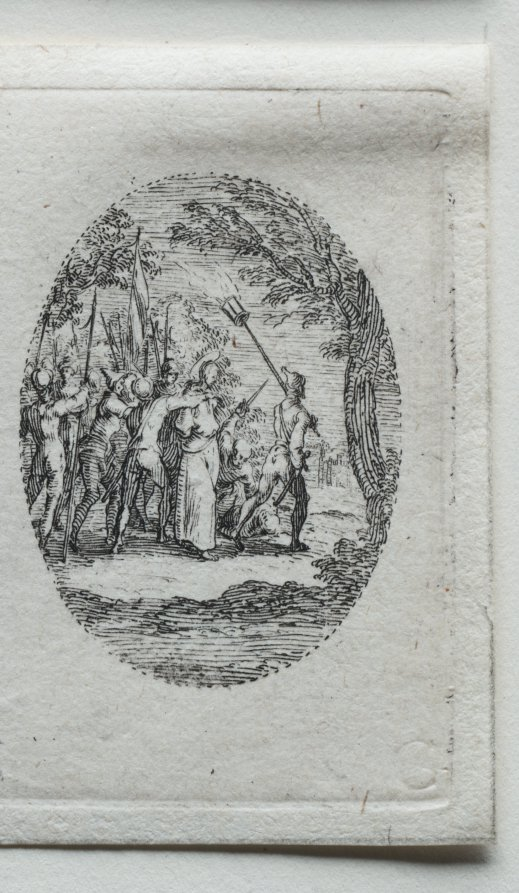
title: The Mysteries of the Passion: Christ Taken Captive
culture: France, 17th century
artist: Jacques Callot (French, 1592–1635)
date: 1631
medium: etching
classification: Print